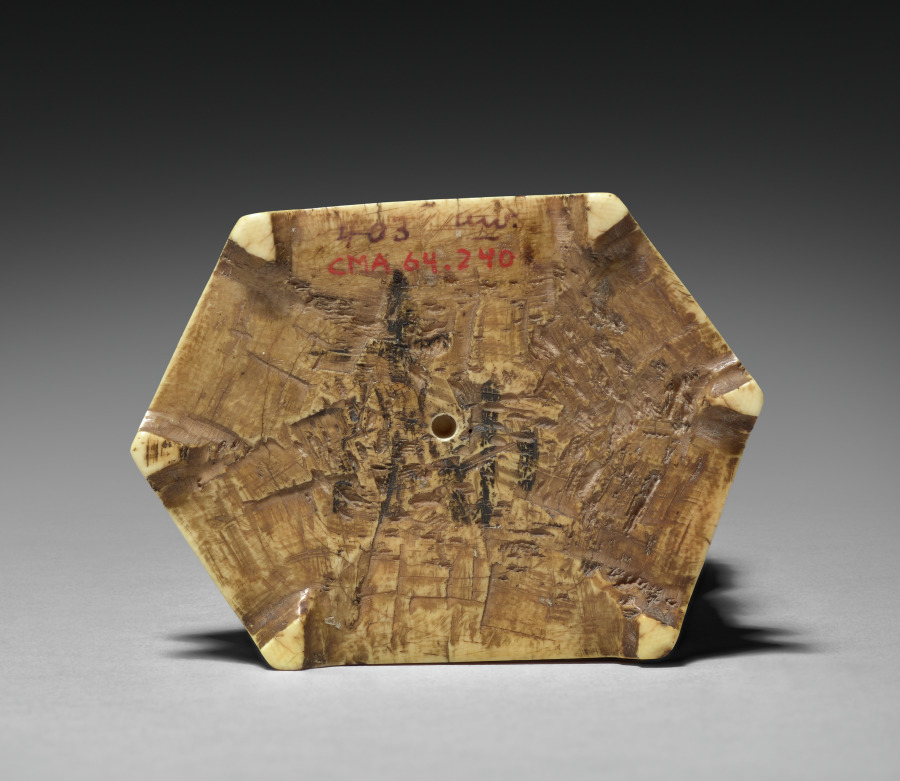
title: Female Figure with Crane and Squirrel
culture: China, Qing dynasty (1644-1911), Kangxi reign (1662-1722)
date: 1662–1722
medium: ivory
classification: Ivory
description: In the Qing dynasty (1644–1911), luxury items became more affordable to larger parts of the society, including women, merchants, and literati in non-official positions. Imperial patronage and a growing urban population encouraged consumption of luxury goods and local craftmanship. This ivory form of a woman with a crane illustrates the superb skills and the creative mind of the talented artisan who sought clients on a competitive market.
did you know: The ivory has aged to a rich amber, while traces of its original red and green paint remain on the woman’s cuffs and collar.